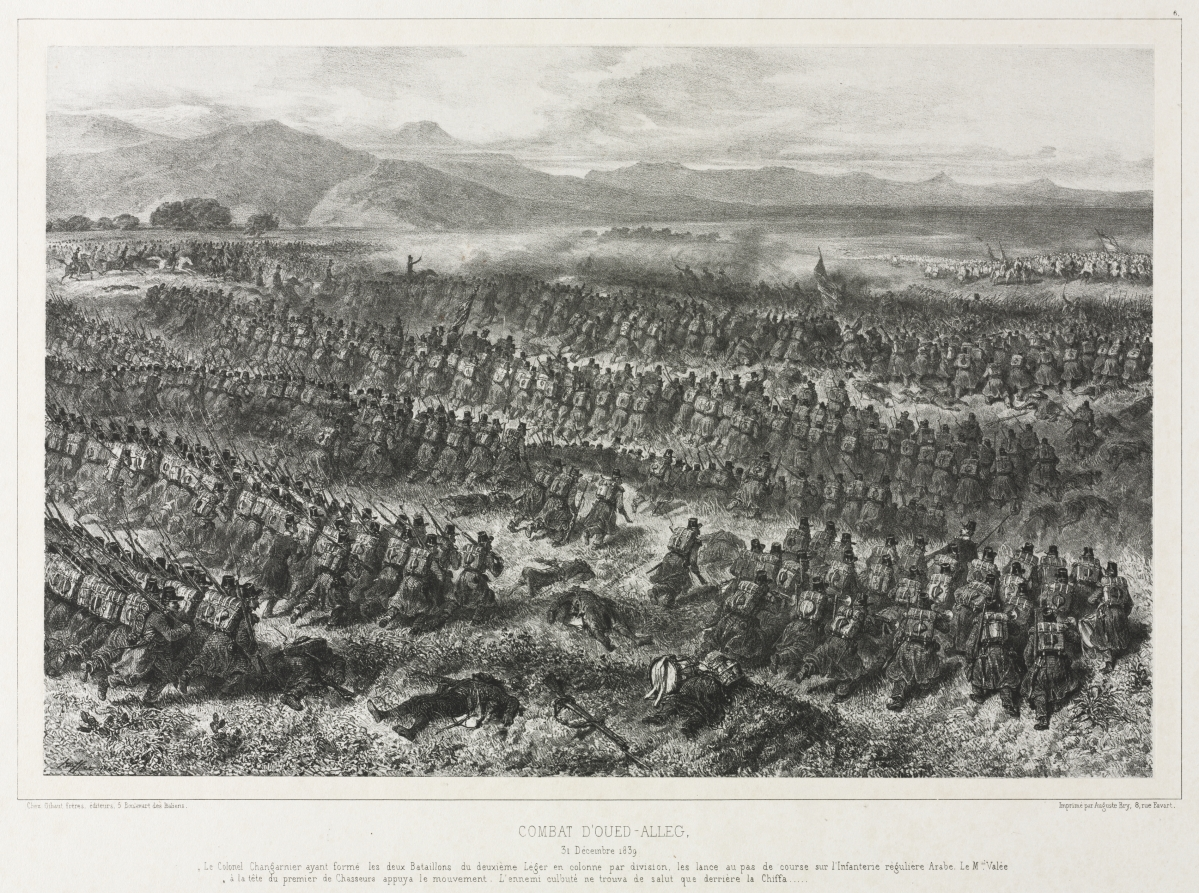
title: Combat of Oued-alleg, 31 December 1839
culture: France, 19th century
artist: Auguste Raffet (French, 1804–1860)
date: 1840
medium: lithograph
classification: Print